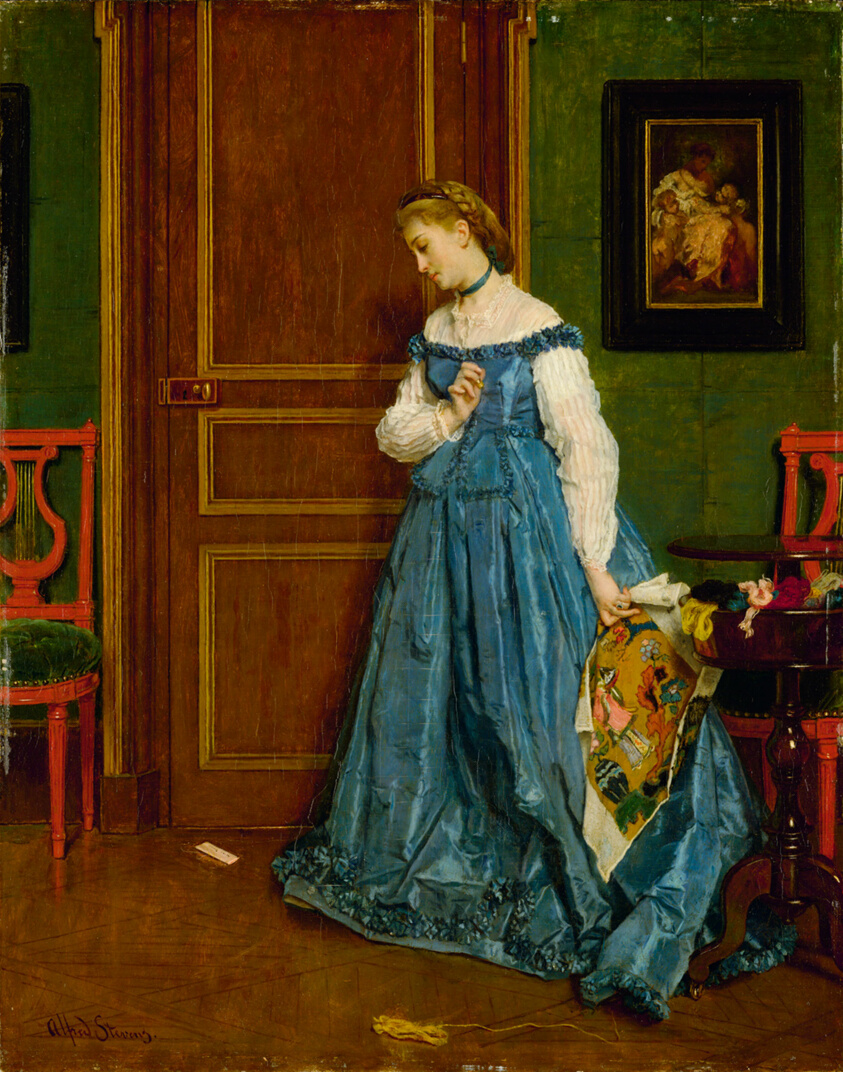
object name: Painting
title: Hesitation (Madame Monteaux?)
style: Realism, nineteenth century, 19th century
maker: Alfred Stevens (Belgian, 1823–1906)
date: c. 1867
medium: Oil on panel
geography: Belgium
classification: painting; paint; oil paintings (visual works); oil on panel; european painting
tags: women, interior, sewing, dresses, chair, table, letters (correspondence), painting, green (color), room, blue, blue (color), red (color), cherubs, thimbles, emotions, portraits